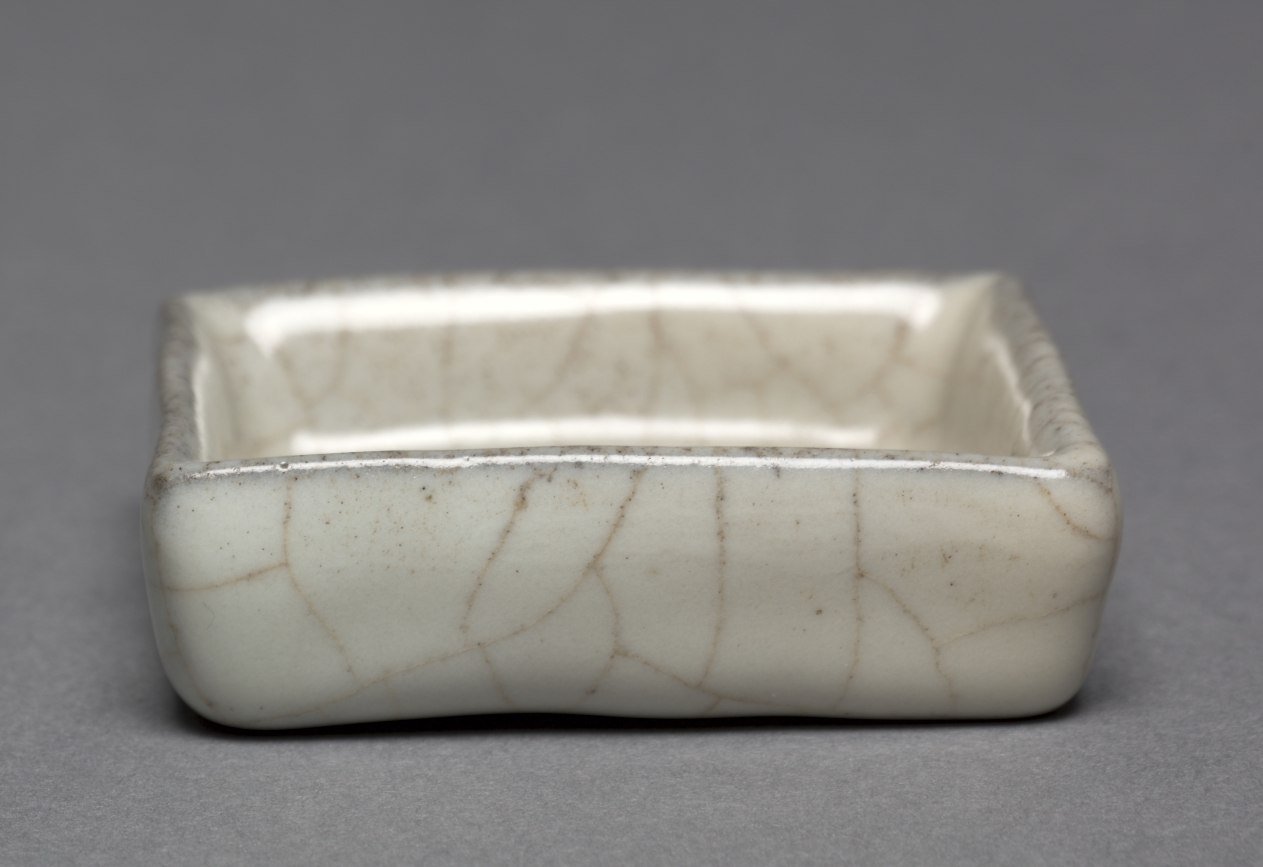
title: Square Brush Washer: Guan ware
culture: China, Hangchou, Suburban Altar Kiln, Southern Song dynasty (1127-1279)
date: 1127–1279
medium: glazed stoneware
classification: Ceramic